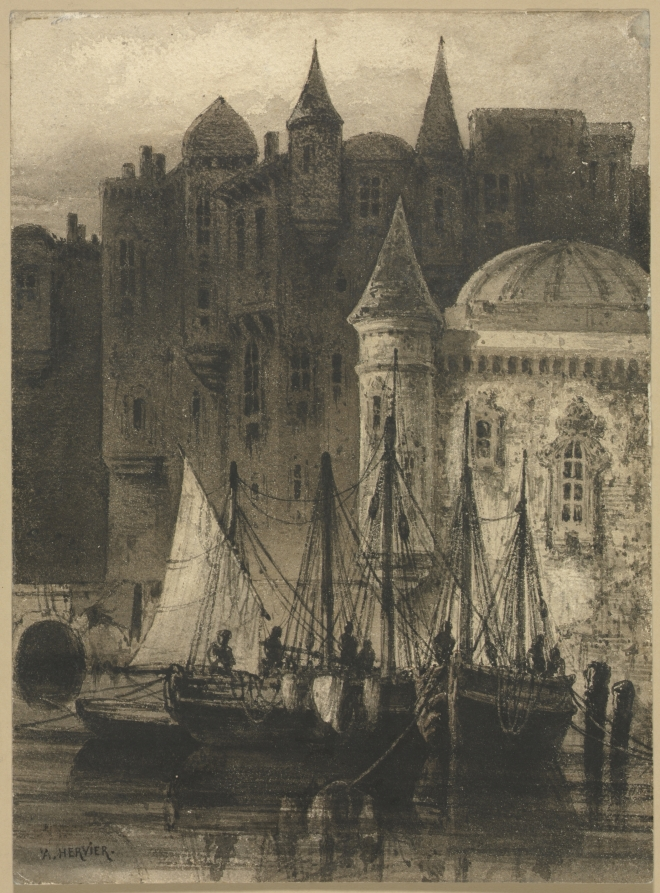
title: Harbor Scene with Boats and Castle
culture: America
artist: Auguste Hervier (American)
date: c. 1800s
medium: black and brown wash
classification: Drawing